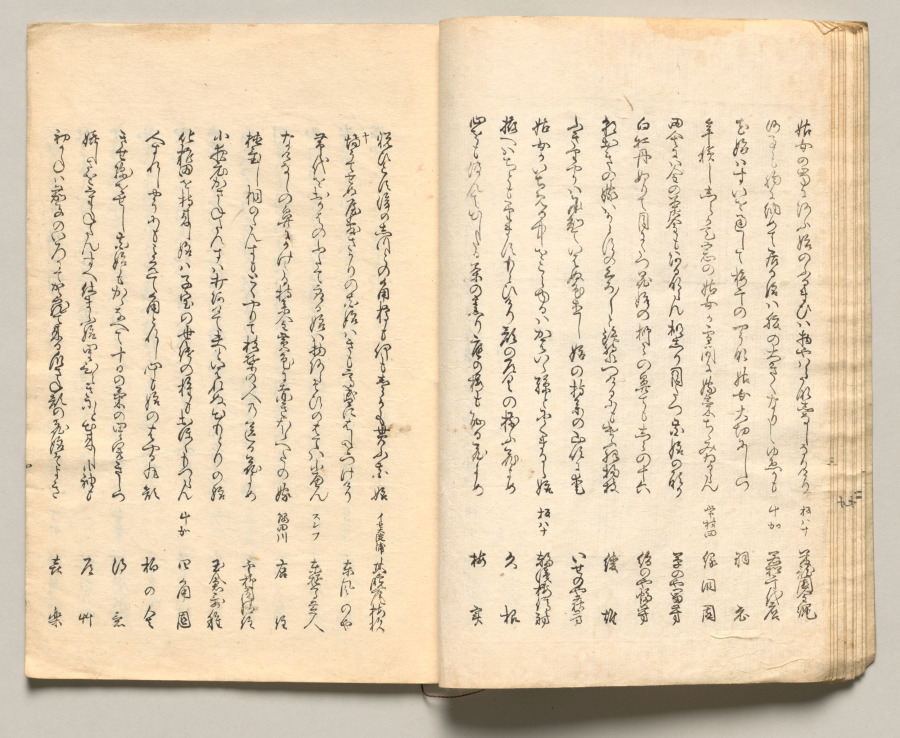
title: Spread Eleven from Volume Five of People of Japan in Light Verse (Kyōka)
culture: Japan, Edo period (1615–1868)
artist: Utagawa Hiroshige (Japanese, 1797–1858)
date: 1857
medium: Woodblock-printed book; ink and color on paper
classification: Bound Volume